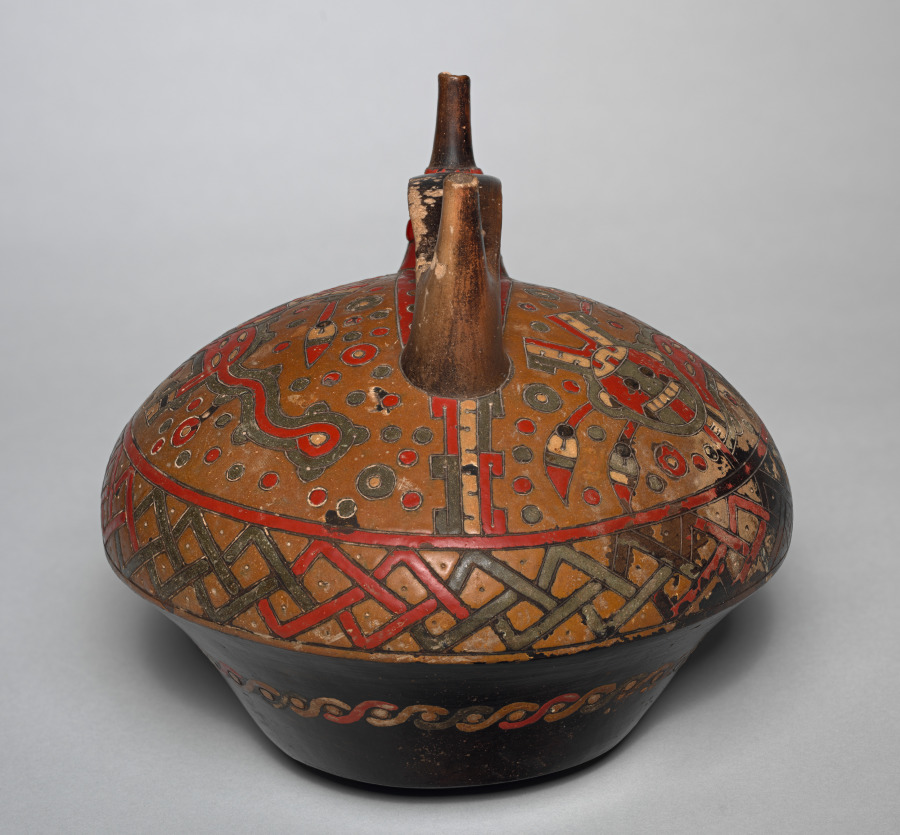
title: Double-spouted Vessel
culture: Andes, south coast, Paracas people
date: 750–1 BCE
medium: Ceramic, resin-based paint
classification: Ceramic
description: The Paracas style, the earliest of Peru’s south coast, focuses on geometric abstraction and polychromy, the latter achieved in ceramics with resin-based paints applied after the vessel was fired. This example is embellished with two monkey- or feline-like creatures whose curvilinearity indicates the vessel was made in the late stages of the Paracas sequence.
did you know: A face with upturned eyes on one spout gives this vessel a specific orientation.